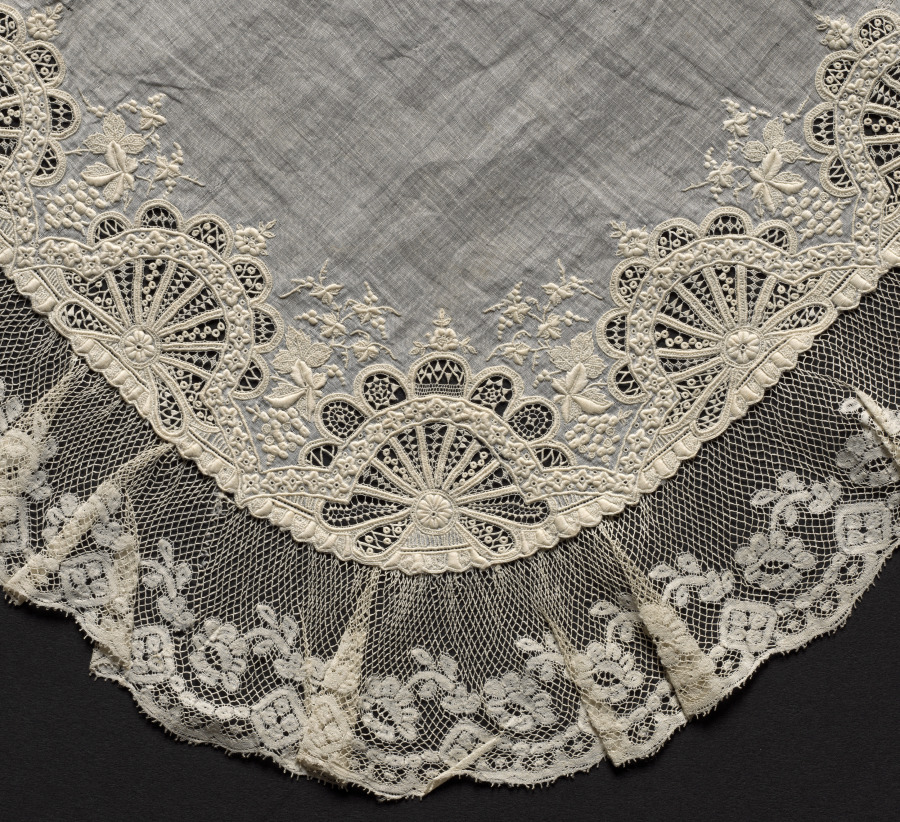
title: Lace Handkerchief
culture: Switzerland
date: 1850–99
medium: Plain weave linen center: bobbin lace (Valenciennes lace) edging and embroidery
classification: Embroidery